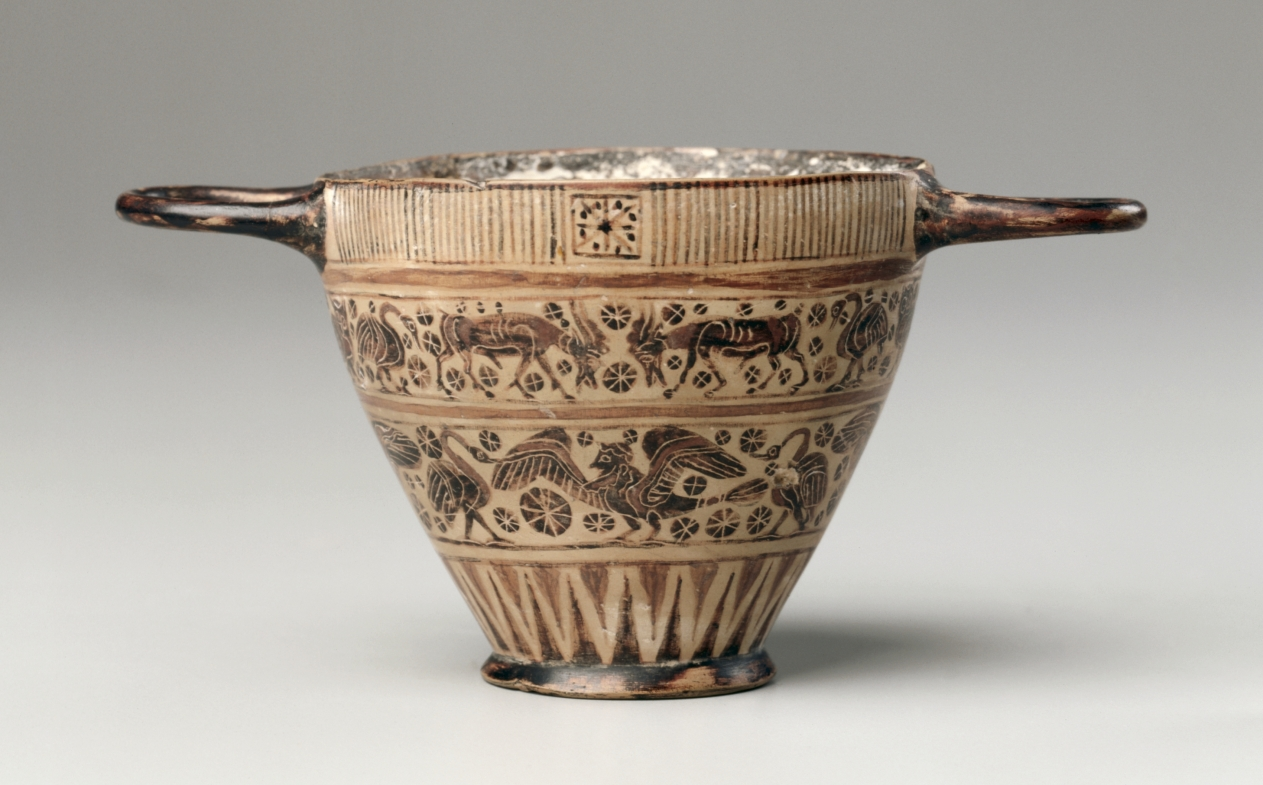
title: Black-Figure Kotyle (Drinking Cup): Animal Friezes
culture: Greek, Corinthian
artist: attributed to Shoe Lane Painter (Greek, early-mid 1900s)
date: 600s–500s BCE, with modern painting and incision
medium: ceramic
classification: Ceramic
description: This vessel began as an authentic drinking cup in the ancient Greek city of Corinth. Originally bearing no figural decoration, it was given new handles and animal friezes in a style recalling that of ancient Corinthian artists. The modern decorator was prolific enough that scholars have recognized their hand, coining the name “Shoe Lane Painter” after a street in Athens where many such vases were sold.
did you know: Although the body of this cup is ancient, its handles and figural decoration are modern.